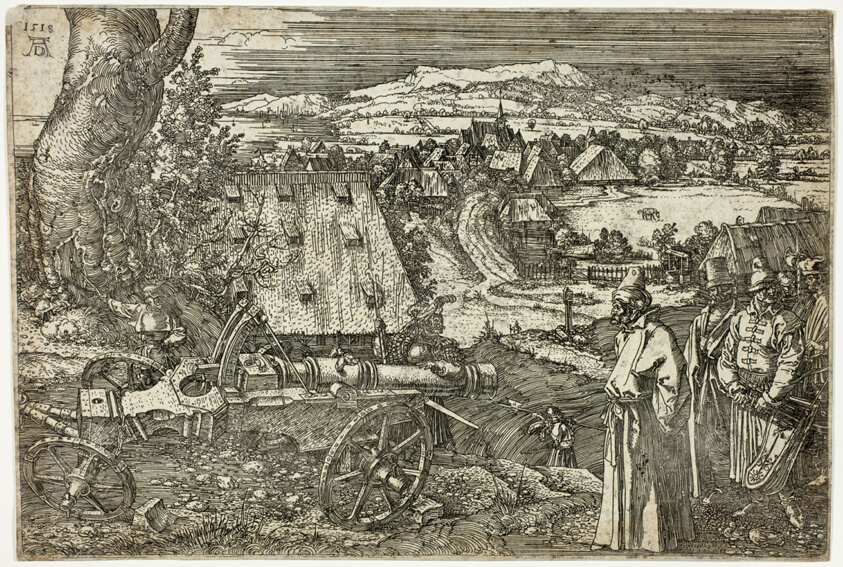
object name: Print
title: Landscape with Cannon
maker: Albrecht Dürer (German, 1471-1528)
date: 1518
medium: Etching in black on cream laid paper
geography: Germany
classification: etching; print; prints and drawing; paper